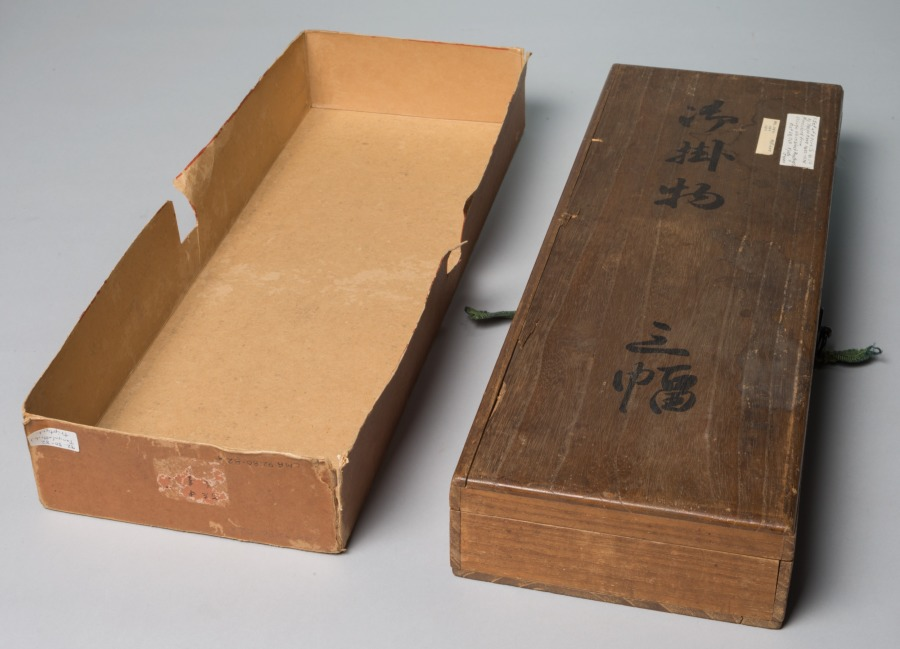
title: Sparrows on Blossoming Plum; A Sage with Tiger; Chinese Bird on Snow-Laden Branch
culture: Japan, Edo period (1615–1868)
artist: Kano Tan’yū (Japanese, 1602–1674)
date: 1661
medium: Triptych of hanging scrolls; ink and slight color on silk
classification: Painting